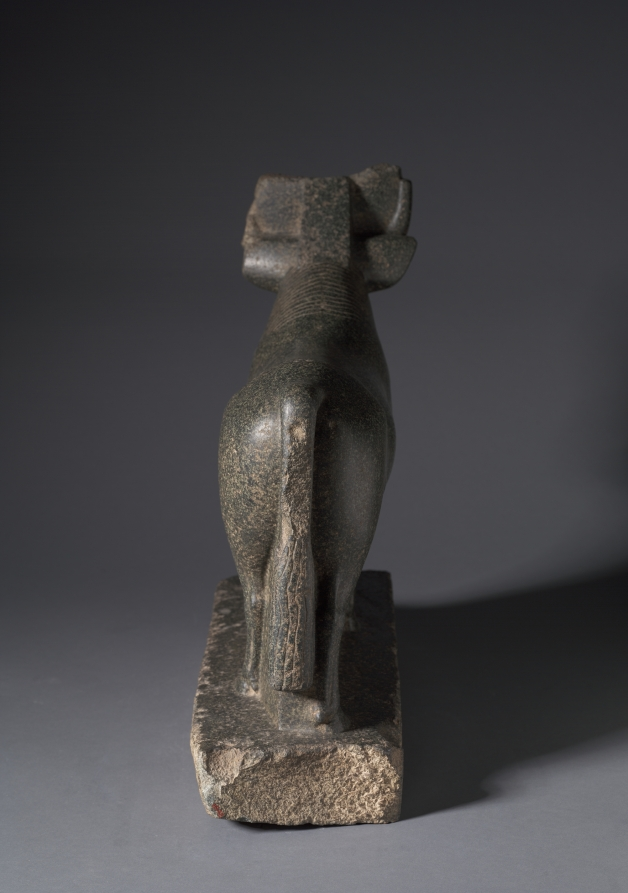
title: Apis Bull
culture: Egypt, Greco-Roman period (332 BCE–395 CE), Ptolemaic dynasty (305–30 BCE)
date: 400–100 BCE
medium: serpentinite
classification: Sculpture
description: Sacred animal cults have a long history in ancient Egypt, but they became even more important in the Ptolemaic and Roman periods. Because each god could incarnate himself into any animal species, beasts of all sorts--dogs, cats, ibises, crocodiles--were protected, venerated, mummified, and collected by the thousands in specialized animal cemeteries. The sacred bull cults were different. Apis, the bull of Memphis, was a god in his own right. But he was also associated with other deities, such as Ptah, the god of Memphis, and Osiris, in the form of Osiris-Apis (or Serapis). Statues and reliefs always show him crowned with a sun disk and cobra. When an Apis bull died, he was given a burial fit for a king in an area of the Memphite cemetery known as the Serapeum.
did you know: A larger base, likely inscribed, may have hidden the rough, unfinished lower edges of this statue.